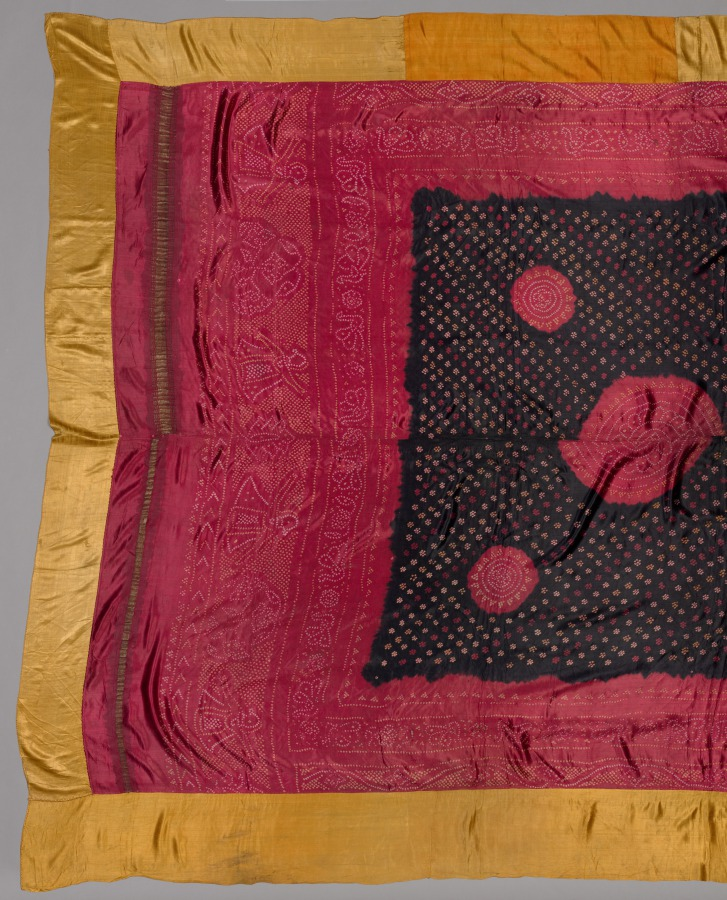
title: Indian Textile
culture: India, 19th - early 20th century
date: 1800s - early 1900s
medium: satin, tied and dyed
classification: Textile